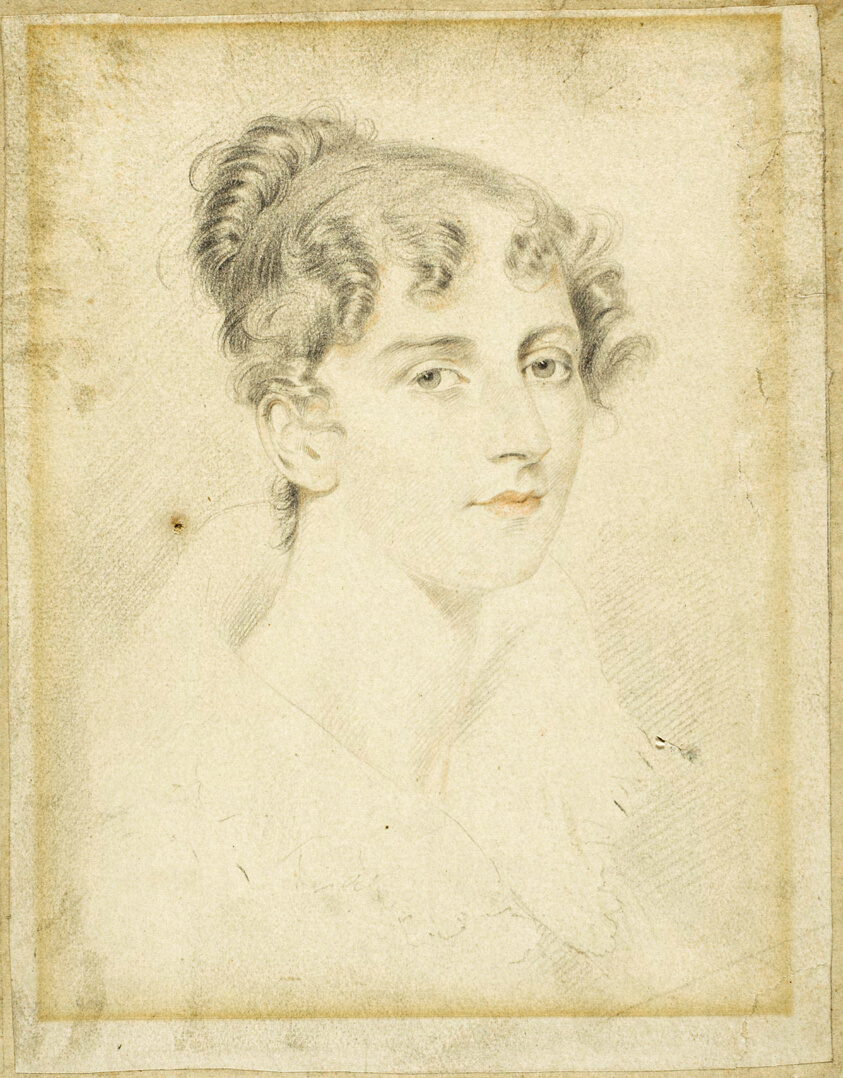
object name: Drawing and Watercolor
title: Portrait of Ann Denman Flaxman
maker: probably George Henry Harlow (English, 1787-1819); possibly Sir Thomas Lawrence (English, 1769-1830)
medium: Graphite, with red pencil, on cream laid paper, laid down on board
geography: England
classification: graphite; drawings (visual works); prints and drawing